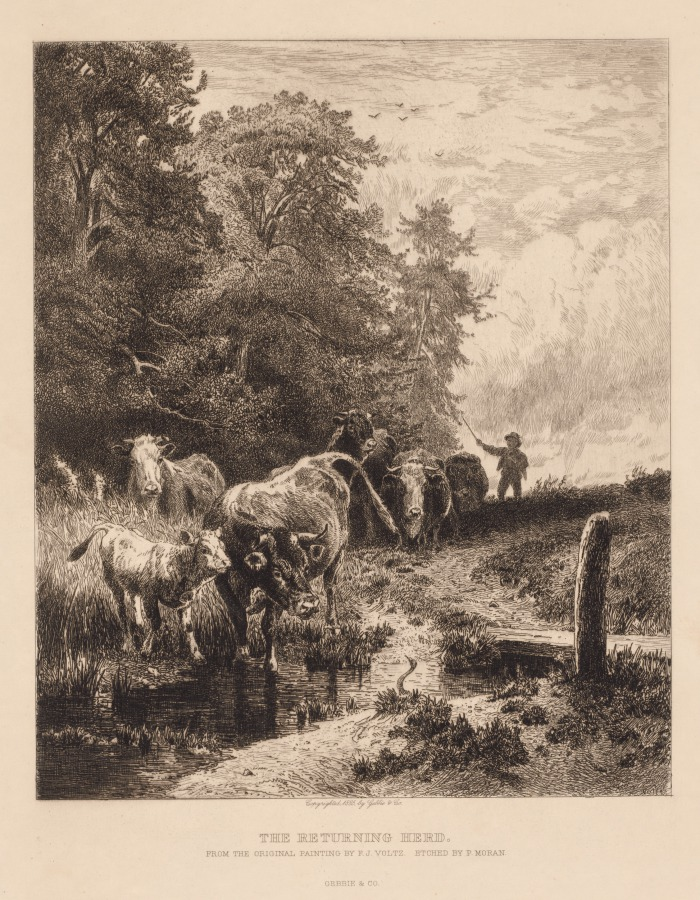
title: The Returning Herd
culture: America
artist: Peter Moran (American, 1841–1914)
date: c. 1885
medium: etching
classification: Print